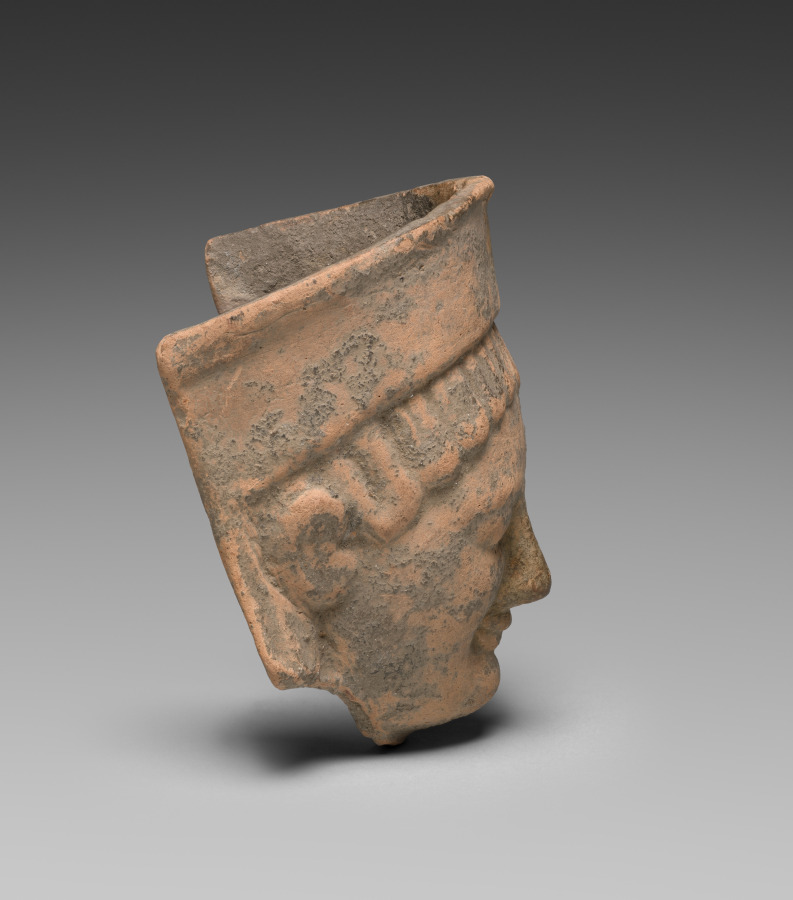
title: Mask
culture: Greece, Sicily, Selinus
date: 550 BCE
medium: terracotta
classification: Sculpture